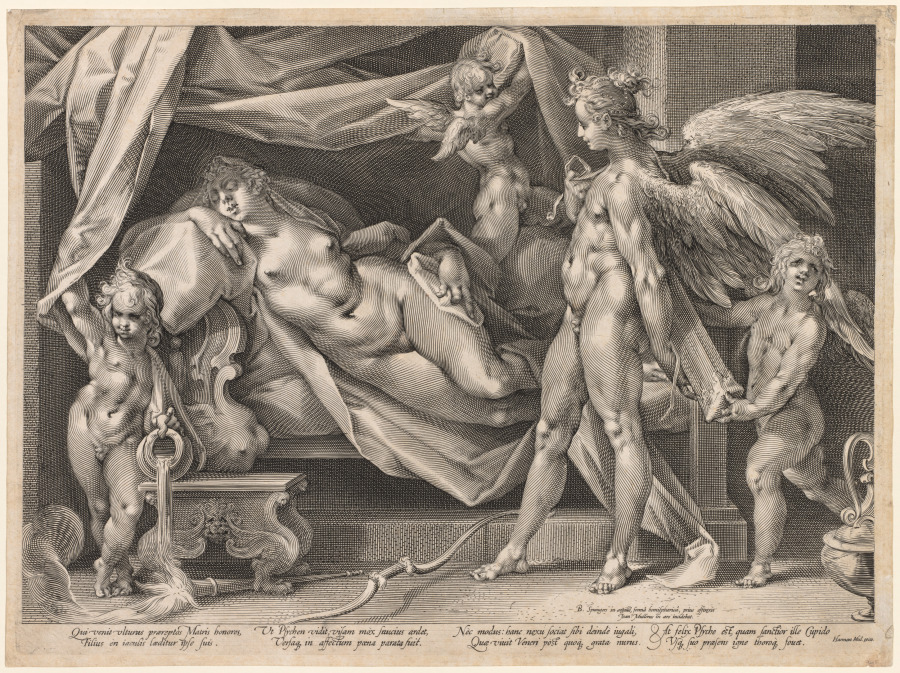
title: Cupid and Psyche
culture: Netherlands, early 17th Century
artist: Jan Muller (Dutch, 1571–1628)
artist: after Bartholomaeus Spranger (Flemish, 1546–1611)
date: c. 1600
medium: engraving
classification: Print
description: Müller adopted Goltzius's engraving style of a dense network of swelling and tapering lines. He sometimes made prints after works by Bartholomeus Spranger (1546-c. 1611), another exponent of the Mannerist style and court painter to the Holy Roman Emperor Rudolph II (1576-1612) in Prague.